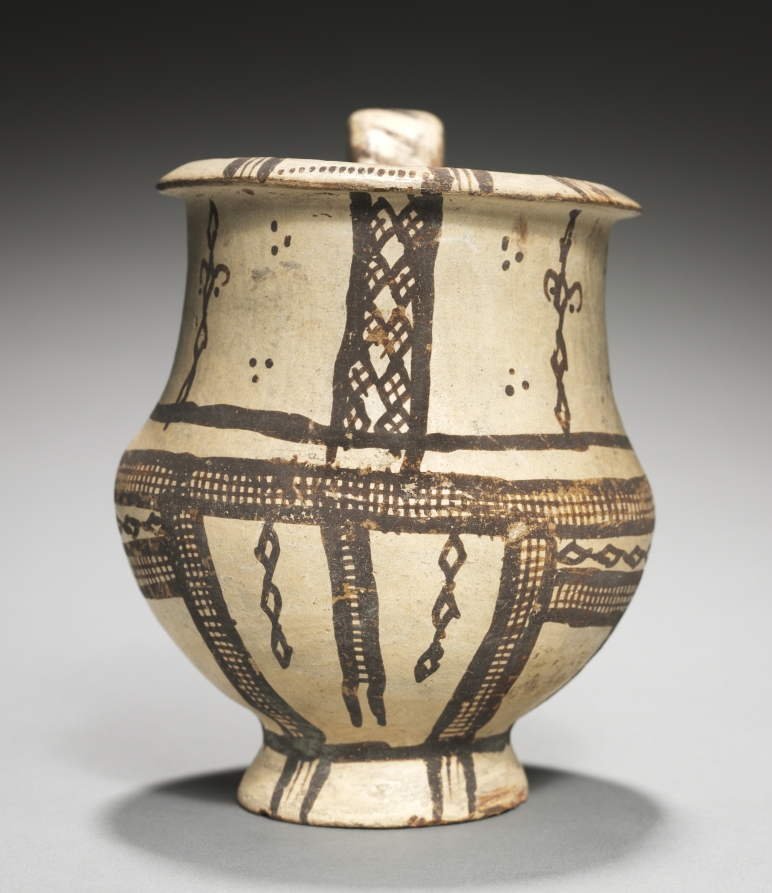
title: Jug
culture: Cyprus, late Cypriot II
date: c. 1450–1200 BCE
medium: white slip ware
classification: Ceramic